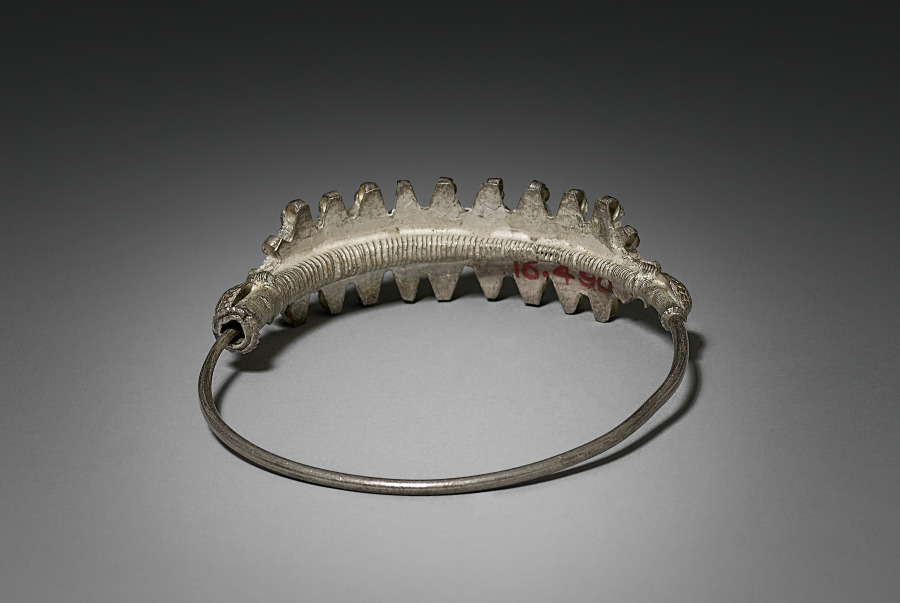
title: Nose Ring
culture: India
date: 20th Century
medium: silver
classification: Jewelry